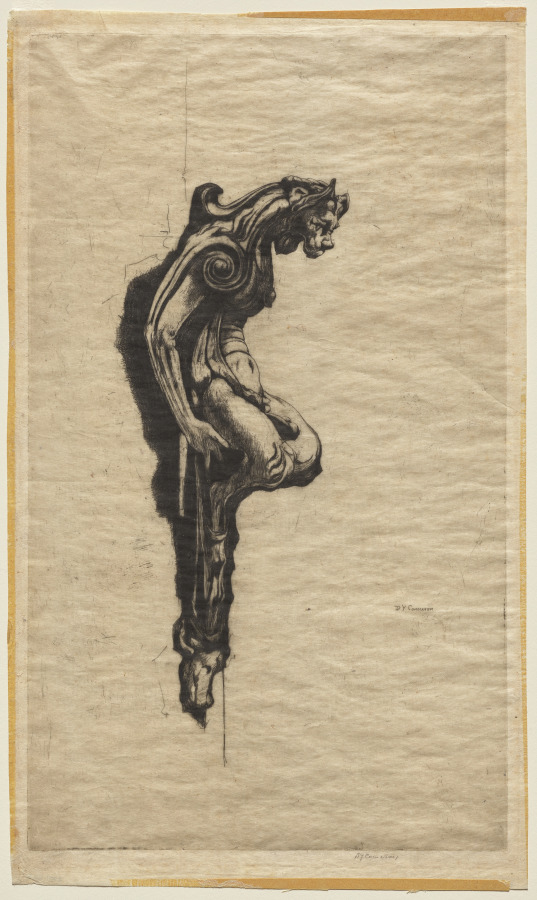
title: The Little Devil of Florence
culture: England, 20th century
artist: David Young Cameron (British, 1865–1945)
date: 1907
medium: etching and drypoint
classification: Print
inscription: signed lower right, in graphite: DY Cameron